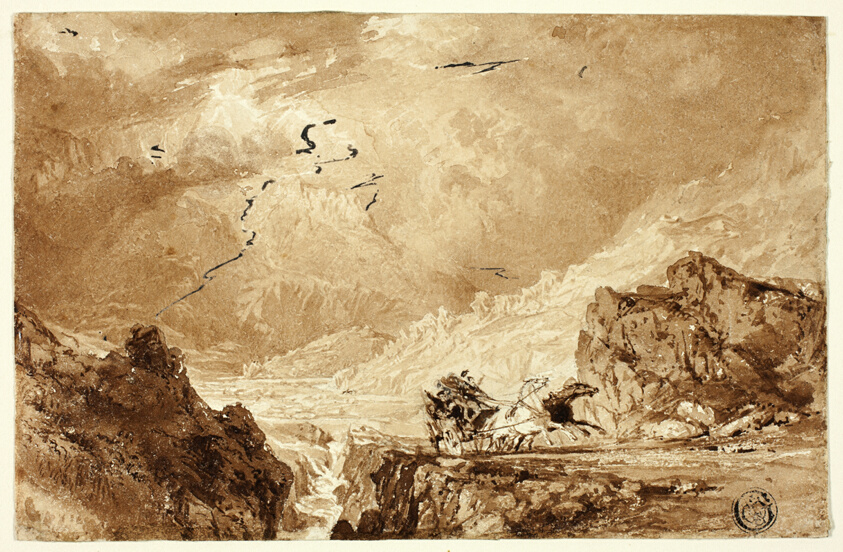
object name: Drawing and Watercolor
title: The Diligence in the Alps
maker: Thomas Allom (English, 1804-1872); or Clarkson Stanfield (English, 1793-1867); or William Henry Bartlett (English, 1809-1854)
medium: Brush and brown wash, heightened with touches of lead white, over traces of graphite, on ivory wove paper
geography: England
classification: pen and ink drawings; drawings (visual works); prints and drawing